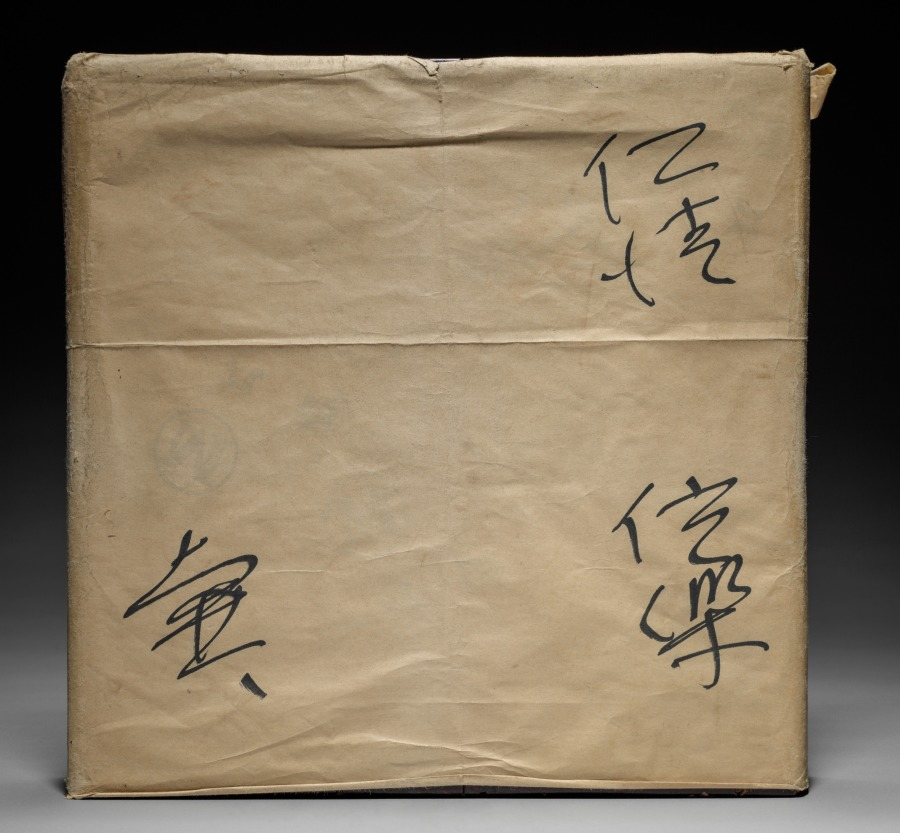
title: Tea Storage Jar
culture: Japan, Edo period (1615–1868)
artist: Nonomura Ninsei (Japanese, active 1640s–90s)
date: mid- to late 1600s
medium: Stoneware with white glaze (Shigaraki style)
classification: Ceramic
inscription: Ninsei seal impressed in the clay on bottom.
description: In this tea storage jar, Nonomura Ninsei reinterpreted a Shigaraki stoneware—made to hold agricultural products and known for its warm orange color, asymmetrical round forms, and irregular natural ash glazes—to produce a more refined piece that would appeal to tea masters seeking a touch of rusticity. In Japanese tea culture, hanging scroll paintings or calligraphy are placed in the tokonoma, or viewing alcove, for participants to admire and discuss along with the utensils used in the gathering. The scrolls are typically paired with vessels containing seasonal floral arrangements.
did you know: This jar may be considered an example of the aesthetic known as kireisabi, or refined rusticity.